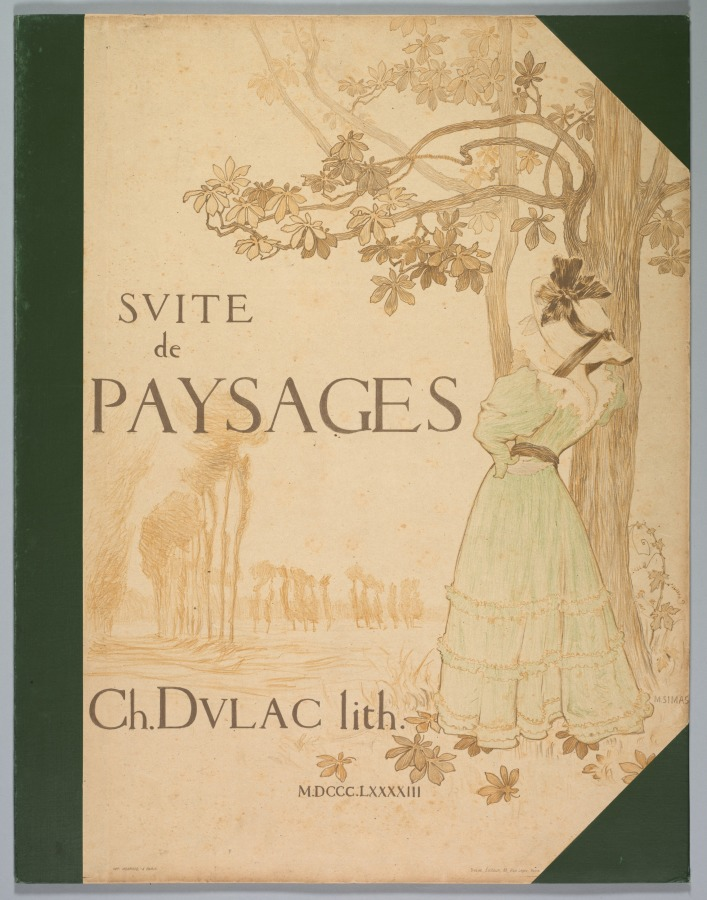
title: Suite de Paysages: Cover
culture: France, 19th century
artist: Charles Marie Dulac (French, 1865–1898)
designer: Eugène Martial Simas (French, 1862–1926)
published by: Monrocq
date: 1892–93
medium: Color lithograph, half-bound with green cloth and illustrated with a lithograph by Eugène Martial Simas (French, 1862–1926), printed in three colors; interior with marbled endpapers.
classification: Print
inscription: In plate, in brown ink: SUITE de PAYSAGES / Ch.DULAC lith. / M.DCCC.LXXXXIII / M.SIMAS / IMP. MONROCQ, à PARIS. / SULAC, Éditeur, 61, Rue Lepic, Paris